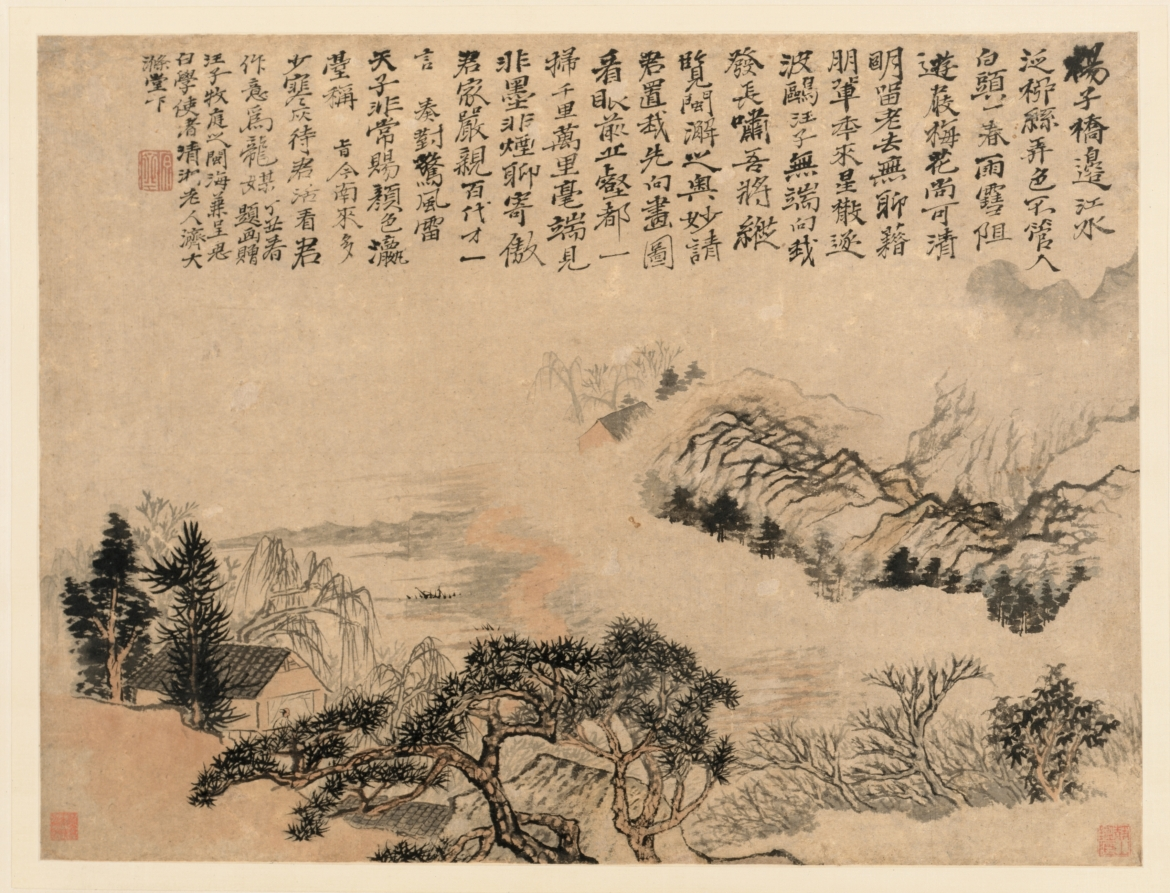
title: Spring Mist over Jiangnan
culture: China, Qing dynasty (1644-1911)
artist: Shitao (Chinese, 1642–1707)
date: 1697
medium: Hanging scroll; ink and light color on paper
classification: Painting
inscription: 揚子橋邊江水泛，柳絲弄色不管人白頭。/ 一春雨雪阻遊屐，梅花尚可清明留。/ 老去無聊藉朋輩，年來星散隨波鷗。/ 汪子無端向我發長嘯，吾將縱覧閩澥之奧妙。/ 請君置我先向畫圖看，眼前丘壑都一掃。/ 千里萬里毫端見，非墨非煙聊寄傲。/ 君家嚴親百代才，一言奏對驚風雷。/ 天子非常賜顏色，灜台稱旨今南來。/ 多少寒灰待君活，看君作意為龍媒。 丁丑春題畫，贈汪子牧庭之閩海。兼呈思白學使。清湘老人濟大滌堂下。[印]原濟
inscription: 2 colophons and 7 additional seals: 1 colophon and 4 seals of He Yuanyu 何瑗玉 (1840-?); 1 colophon and 2 seals of Li Xinhui (19th-20th c.); 1 seal unidentified.